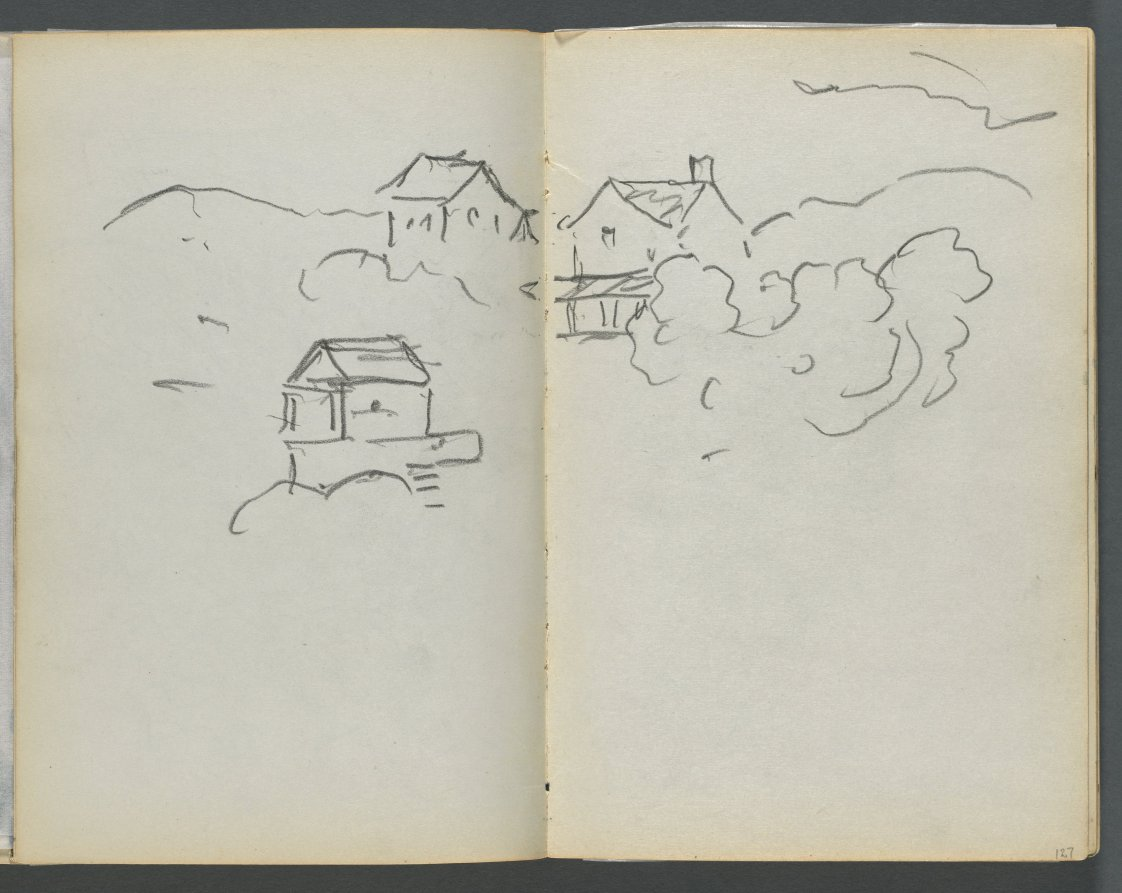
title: Sketchbook, The Dells, N° 127, page 126 & 127: Landscape with Houses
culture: America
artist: Maurice Prendergast (American, born Newfoundland [now Canada], 1858–1924)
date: c. 1919–1921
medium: graphite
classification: Bound Volume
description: This sketchbook contains 59 pages of graphite drawings and 16 watercolors made at various locations on Cape Ann, Massachusetts.